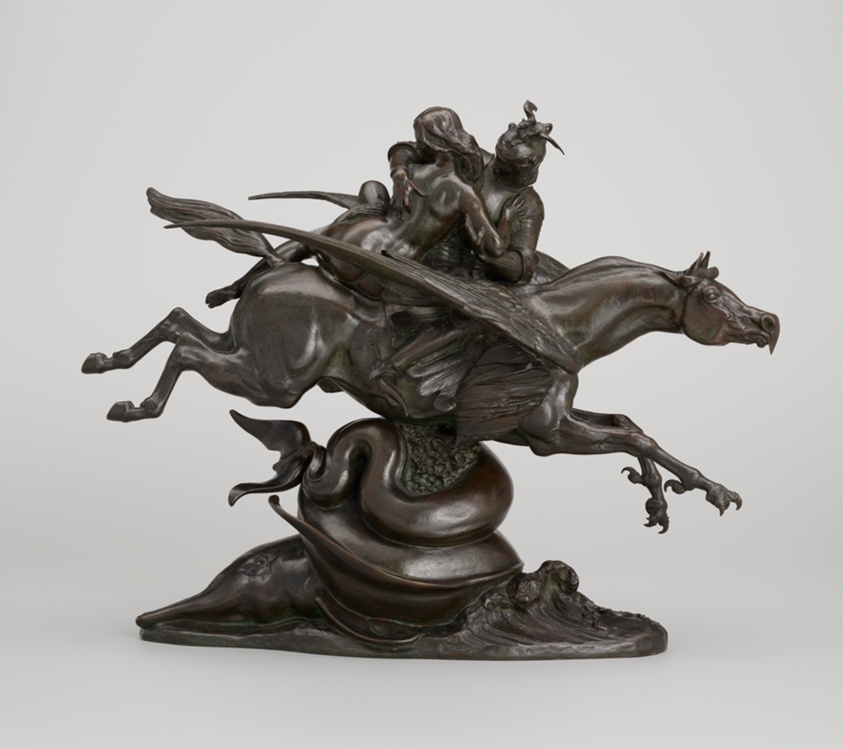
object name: Sculpture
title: Roger and Angelica Mounted on the Hippogriff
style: nineteenth century, 19th century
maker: Antoine Louis Barye (French, 1795–1875)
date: Modeled c. 1840, cast c. 1884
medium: Bronze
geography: France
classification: statuette; french; sculpture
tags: mythical, woman, royalty, royal, poetry, man, knights, fantastic beasts, animals